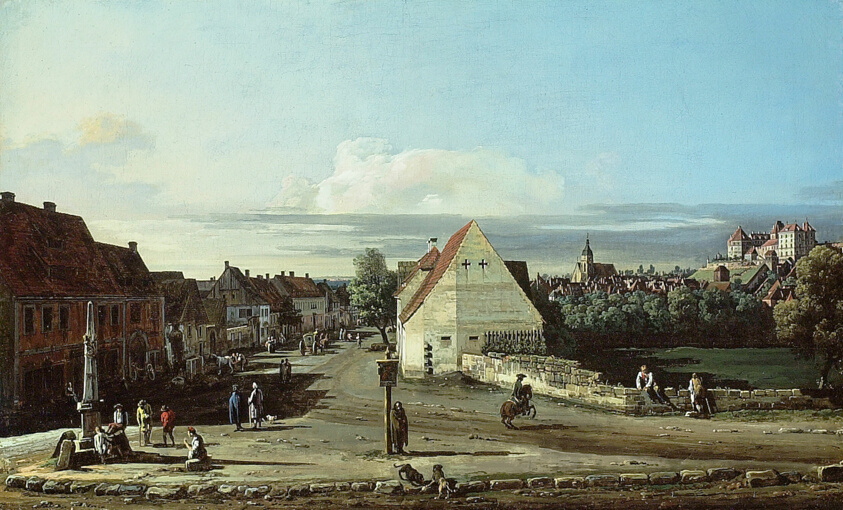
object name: Painting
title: View of Pirna with the Fortress of Sonnenstein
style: 18th Century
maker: Bernardo Bellotto (Italian, 1721–1780)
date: c. 1760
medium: Oil on canvas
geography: Italy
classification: oil on canvas; Italian; paint; painting; european painting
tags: townscapes, road, wall, church, clouds, sky, buildings, building, trees, animals, women, men, horses, figures, towns, fortresses